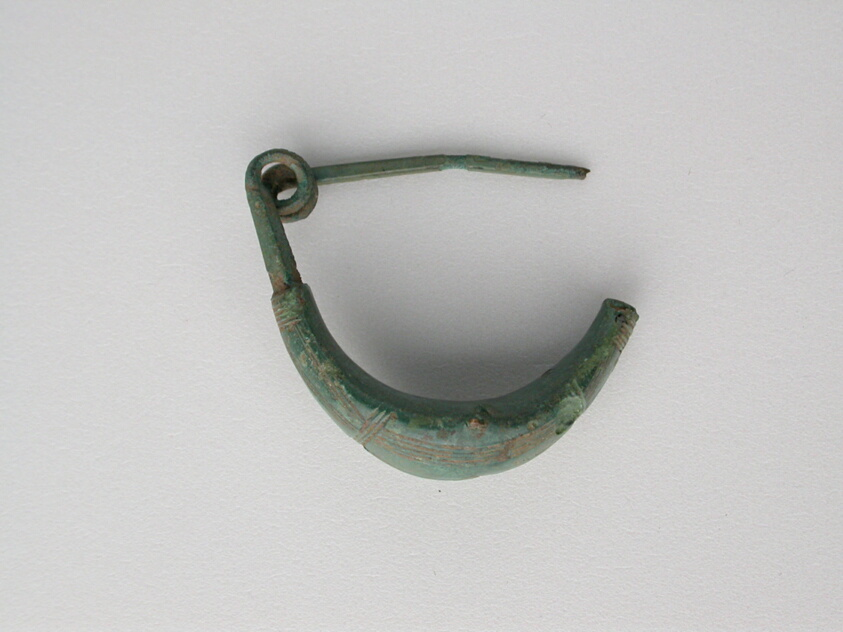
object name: Costume and Accessories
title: Leech Fibula (Brooch)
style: geometric, ancient, greek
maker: Greek; Thessaly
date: Geometric Period (800–700 BCE)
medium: Bronze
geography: Thessalía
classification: votive offering; ex-voto; fibula; costume